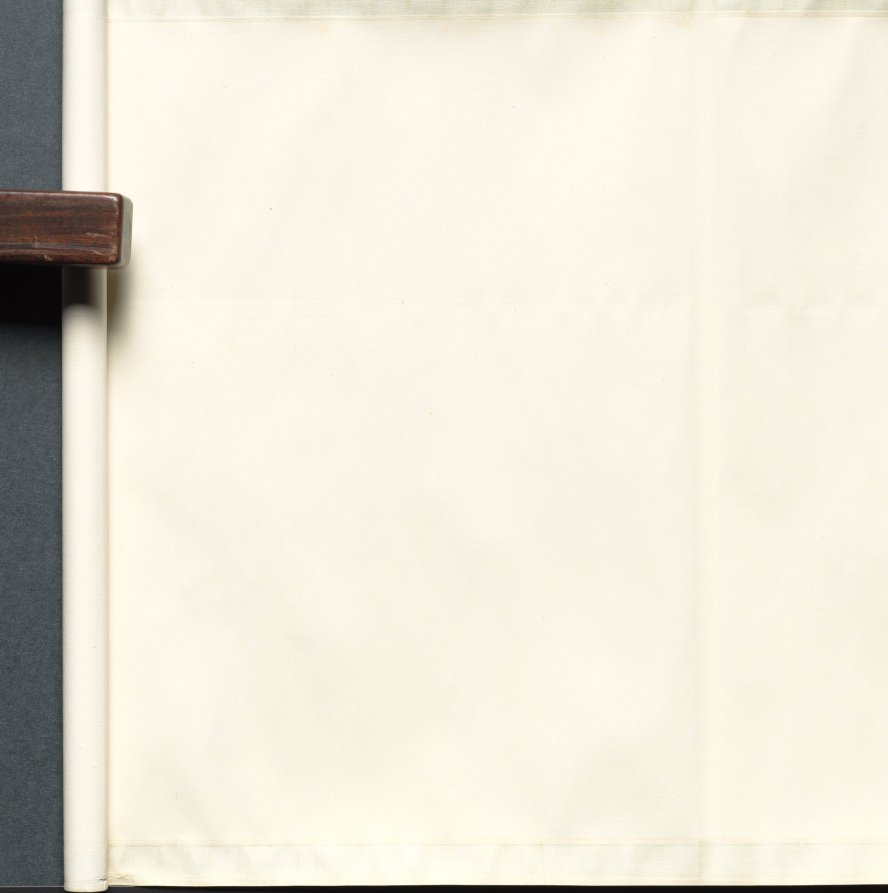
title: Fisherman's Joy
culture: China, Ming dynasty (1368–1644)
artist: Qian Gu (Chinese, 1508–c. 1578)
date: 1572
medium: Handscroll; ink and light color on paper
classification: Painting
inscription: Artist's inscription, signature, and seal: On the autumn day of the jen-shen year [1572], P'eng-ch'eng, Ch'ien Ku painted [this]. [seal] Hsüan-ch'ing shih. 2 colophons, both dated 1689, and 5 additional seals of Yün Shou-p'ing (1633-1690).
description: This painting has a scene showing two small crafts, each manned by two fishermen, practicing a traditional fishing method. In one of them, a man uses a bamboo pole to direct the movements of a cormorant bird sent into the water. Cormorant fishing, witnessed in some areas of the lower Yangzi River, appears in Zhe school paintings. Qian Gu may have borrowed these narrative figure scenes from Zhe school paintings, while his vantage point, brushwork, and soft tones align with the Wu school style. Scenes of fishermen appealed to urban and educated audiences who idealized the self-sufficient independence of fisherfolk.